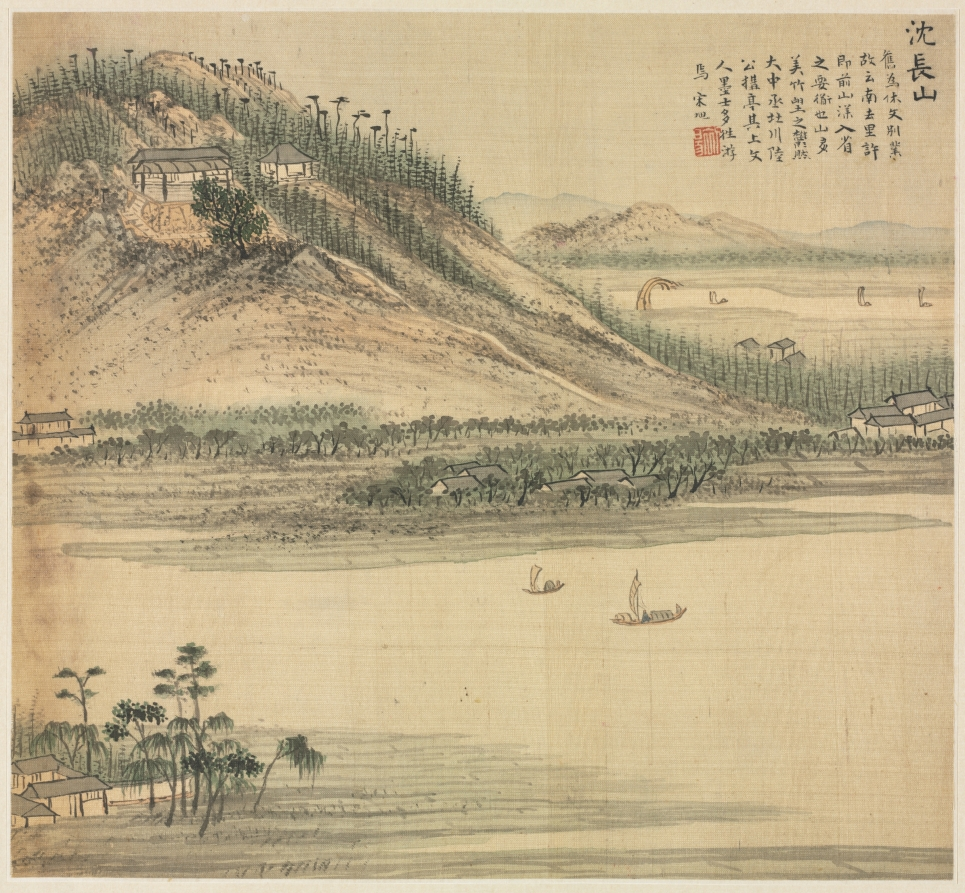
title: Mt. Shenchang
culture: China, Jiaxing, Ming dynasty (1368–1644)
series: Eighteen Views of Huzhou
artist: Song Xu (Chinese, 1525-c. 1606)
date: c. 1588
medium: Album leaf; ink and color on silk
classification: Painting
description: By the 1500s, visits to historic and scenic sites in the lower Yangzi delta stimulated an increase of printed illustrated travel books. Topographical depictions of local scenery flourished. Leaves from this album illustrates sites around Lake Tai of the two adjacent counties Changxing and Wuxing (modern Huzhou). Song Xu, who lived intermittently in Jiaxing and Songjiang, must have passed through Wuxing by boat and thus knew the region. The paintings are inscribed with gazetteerlike notations, suggesting that the album was produced for clients as commemorative works, a travel guide, or for “armchair travel” (woyou) in one’s mind.